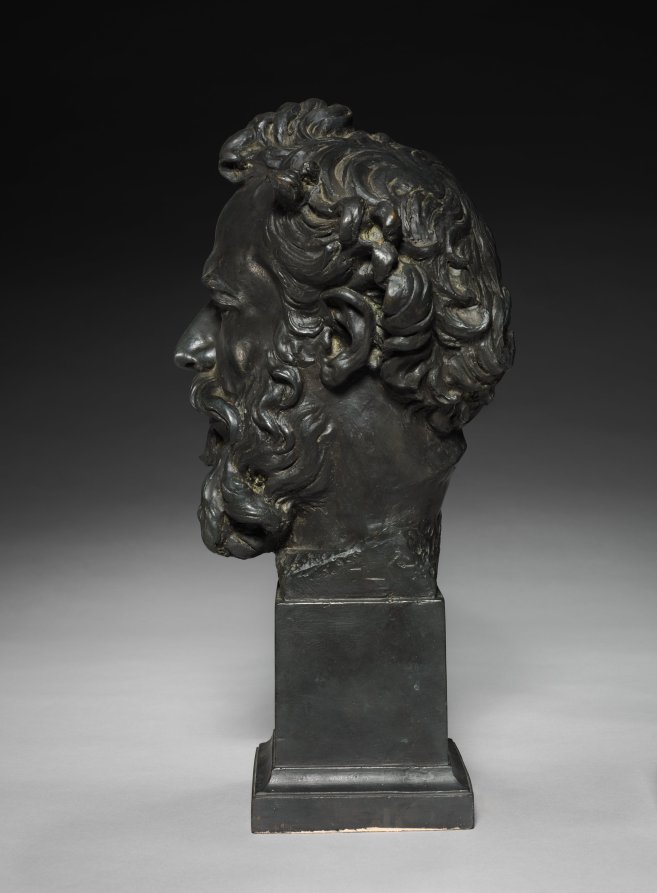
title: Head of Alphonse Legros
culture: France, 19th century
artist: Jules Dalou (French, 1838–1902)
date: c. 1876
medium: bronze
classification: Sculpture